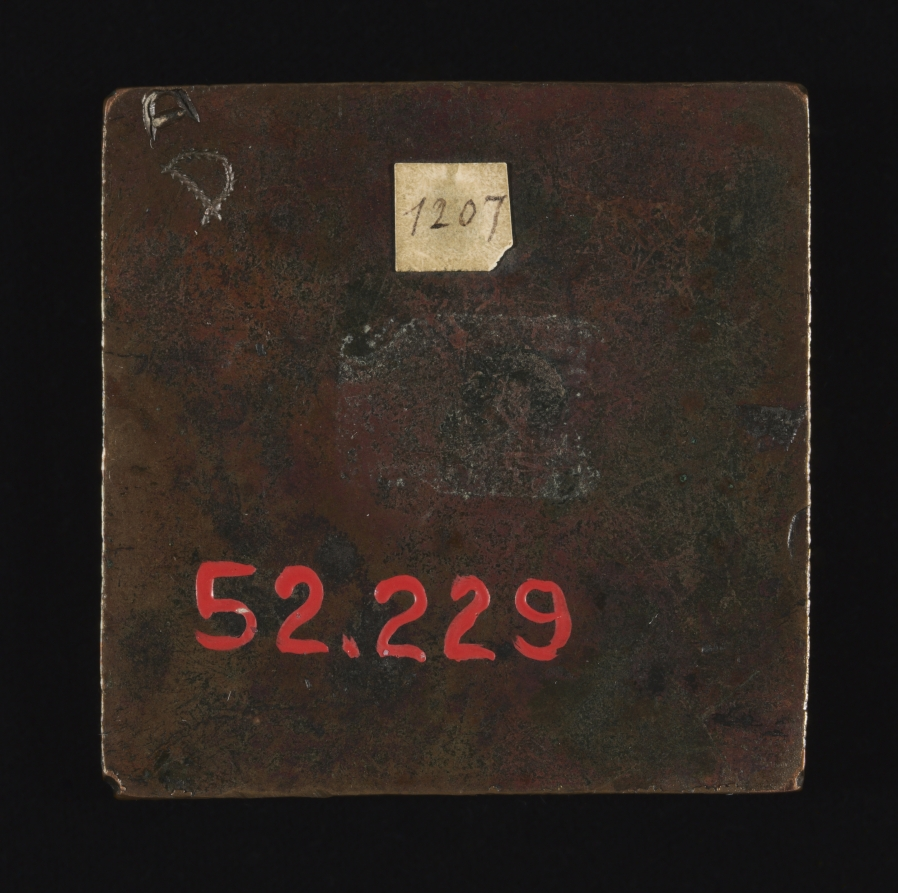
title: Plaque: Prudentia (Prudence)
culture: Mosan, Valley of the Meuse, Gothic period, 12th century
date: c. 1160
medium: gilded copper, champlevé enamel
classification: Enamel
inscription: on front, in gilt lettering: Prudentia.